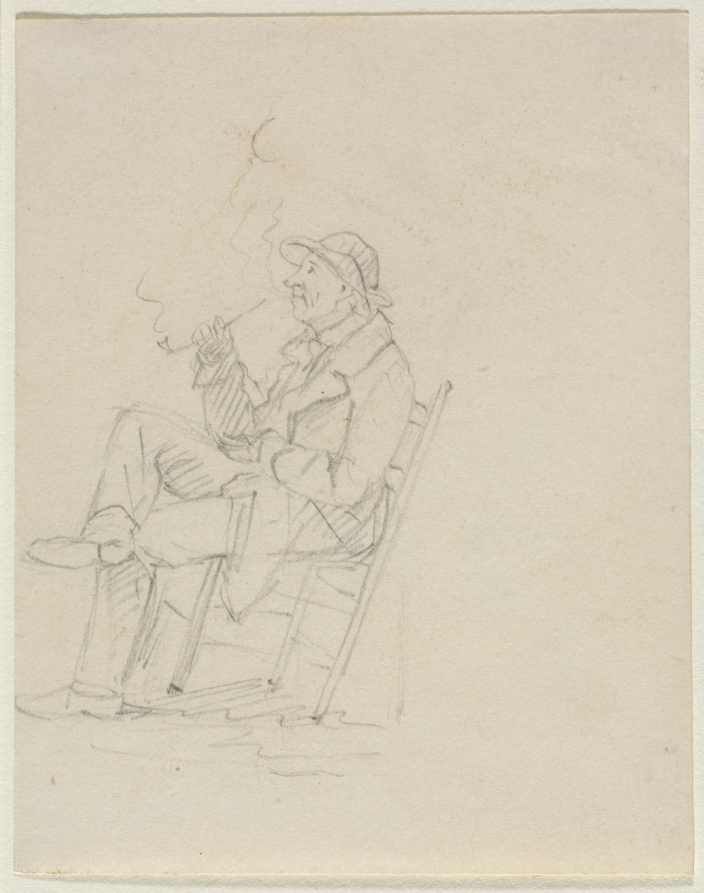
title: Man Smoking a Pipe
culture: America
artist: William Sidney Mount (American, 1807–1868)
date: c. 1827–68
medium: graphite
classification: Drawing